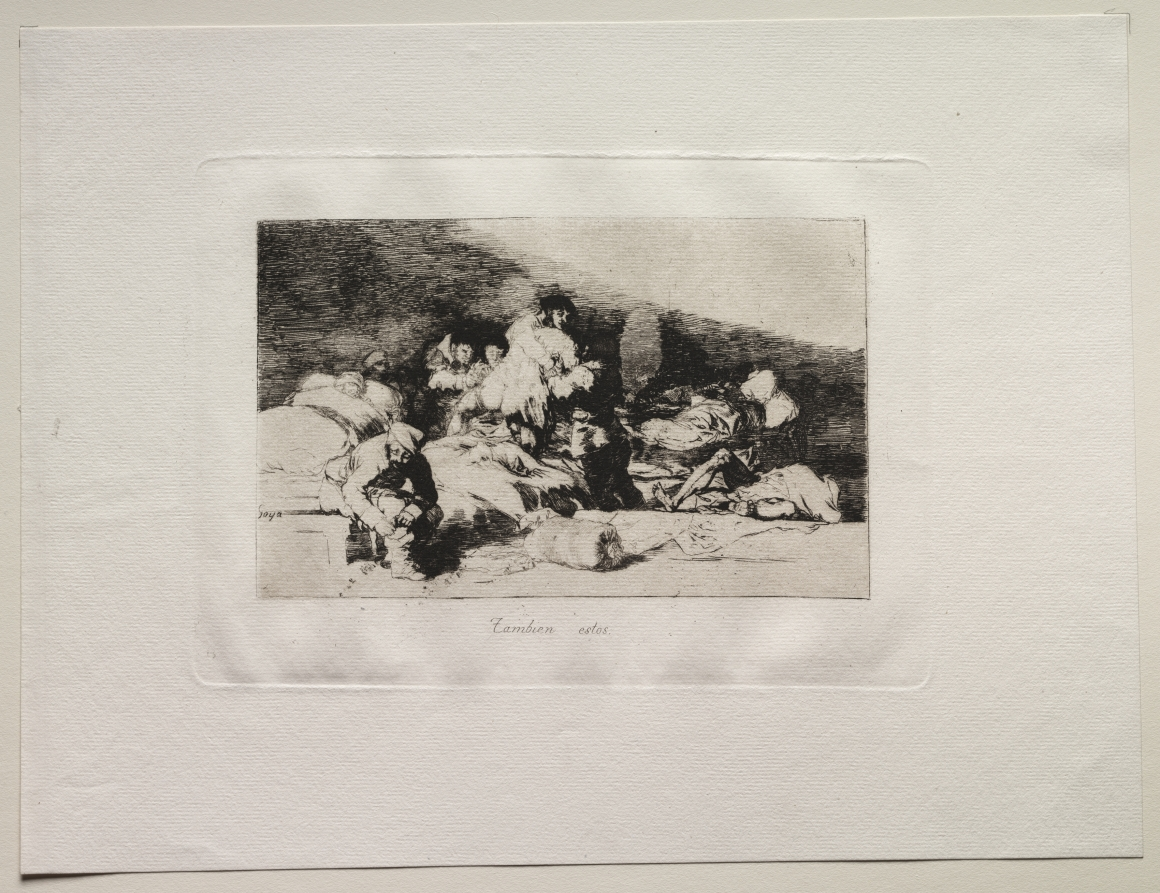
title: The Horrors of War: These Too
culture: Spain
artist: Francisco de Goya (Spanish, 1746–1828)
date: c. 1810–20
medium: etching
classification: Print